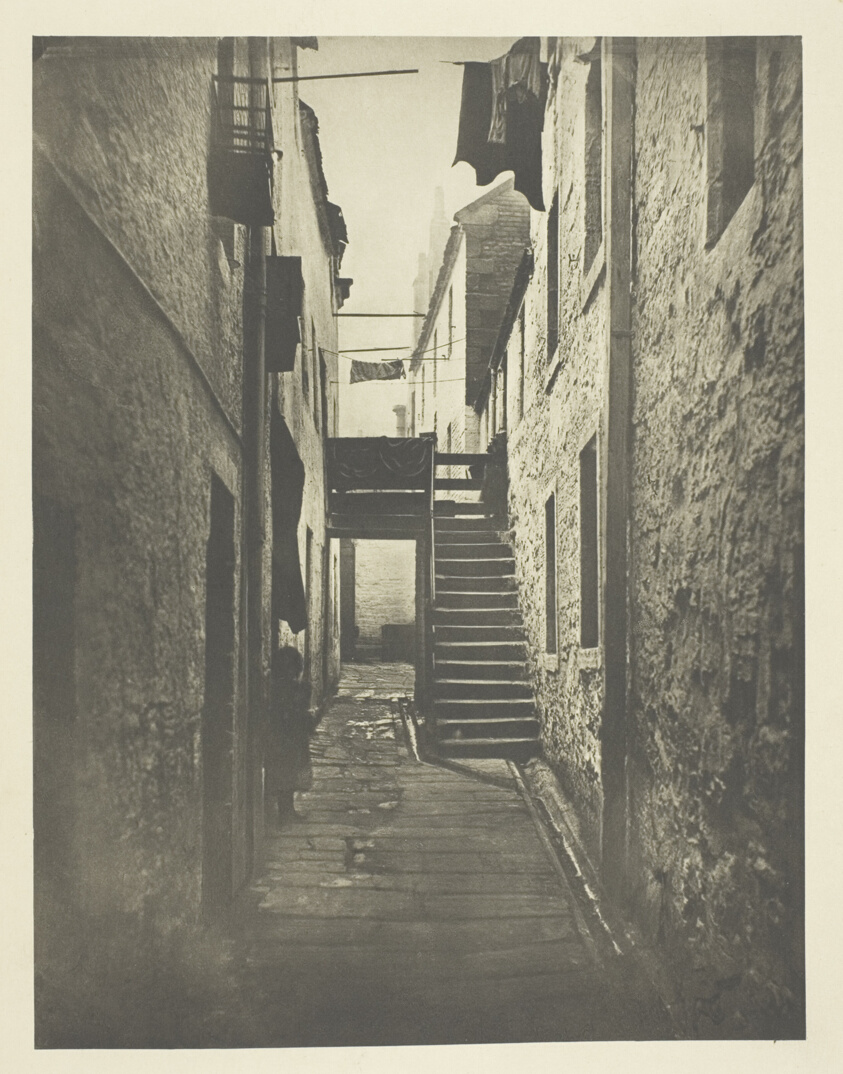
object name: Photograph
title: Close No. 128 Saltmarket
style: 19th century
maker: Thomas Annan (Scottish, 1829–1887)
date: 1868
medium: Photogravure, plate 30 from the book "The Old Closes & Streets of Glasgow" (1900)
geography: Scotland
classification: photograph; photography